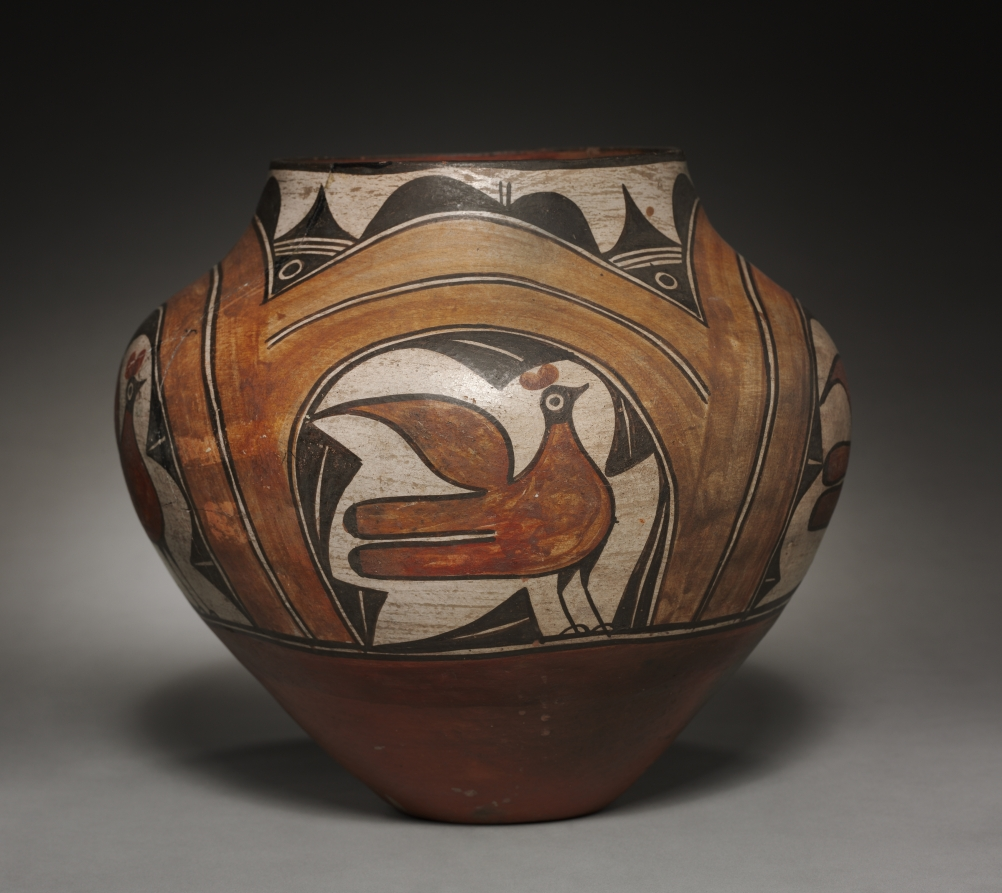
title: Water Jar/ Olla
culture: Southwest, Pueblo, Zia, Post- Contact Period, 20th century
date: 1900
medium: ceramic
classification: Ceramic